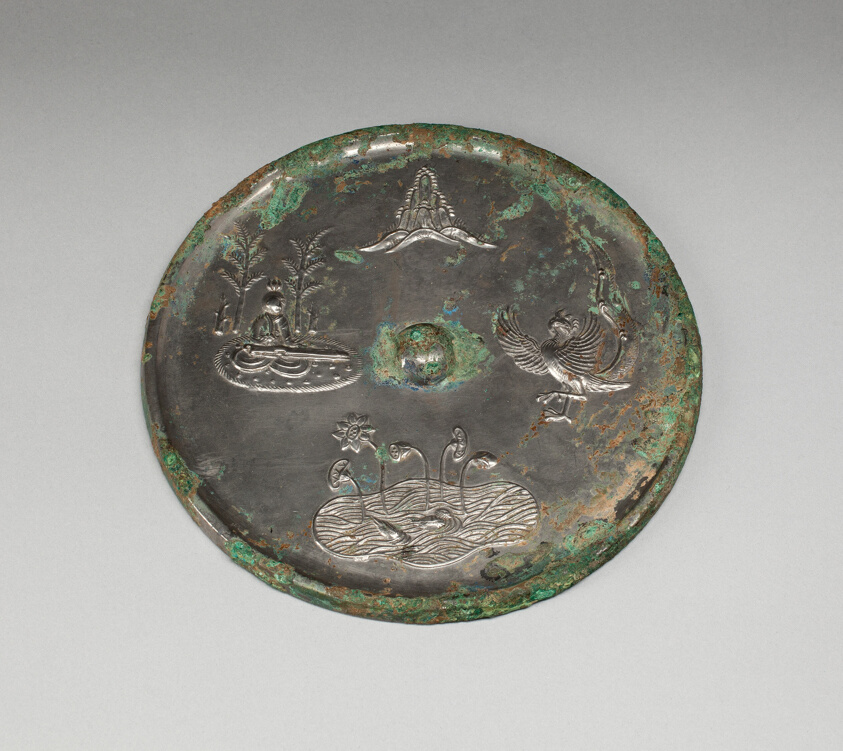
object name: Decorative Arts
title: Mirror with Images of Purity and Immortality and “Lion and Grapevine” Design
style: Chinese (culture or style)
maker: China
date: Tang dynasty (618–907), 8th century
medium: Bronze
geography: China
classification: bronze; metal; mirror; asian art; ritual objects